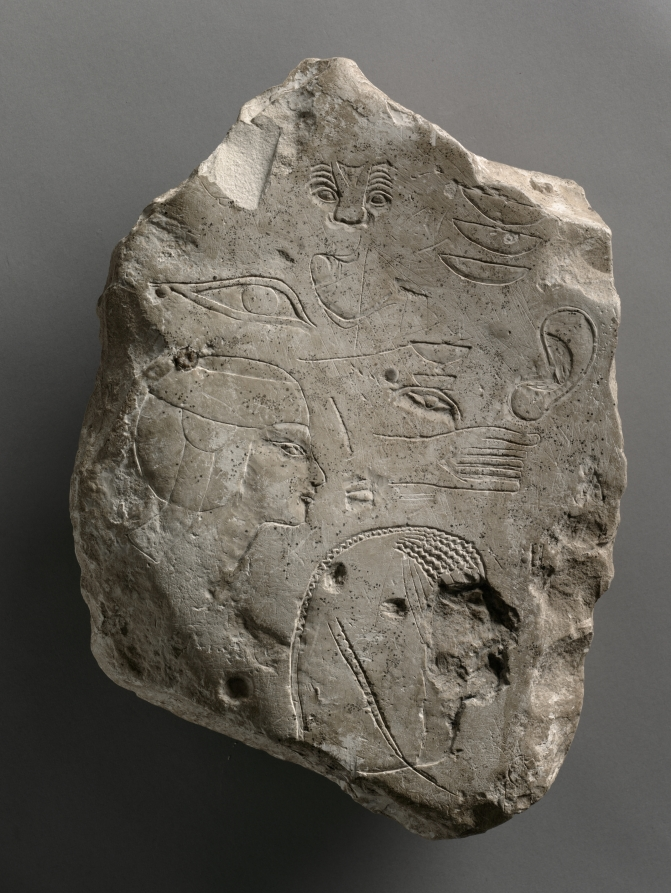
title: Trial Piece Worked on Both Sides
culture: Egypt, probably Thebes, New Kingdom (1540–1069 BCE), Dynasty 18, reign of Amenhotep III (1390–1352 BCE)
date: c. 1391–1353 BCE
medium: limestone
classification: Sculpture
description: This carved flake of limestone provides a fascinating glimpse of the ancient artist at work. The rather routine, basic subjects of this side show a far lower level of accomplishment than the other. The sole details of any skill are the incomplete head of the god Bes at the bottom center and the human ear at the left edge. The simple neb-signs (baskets) are poorly executed, and the drawing of the hand is embarrassingly bad. At the lower right is a thickly banded human eye. Above that is the fair head of a princess wearing a short wig, wide headband, and thick sidelock. At the upper left are the beginnings (or the remains) of the bewigged head of a courtier, the face mostly obliterated.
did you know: Trial pieces were a necessity of this busy building period because new styles were continually introduced and rapid training of apprentices was needed.